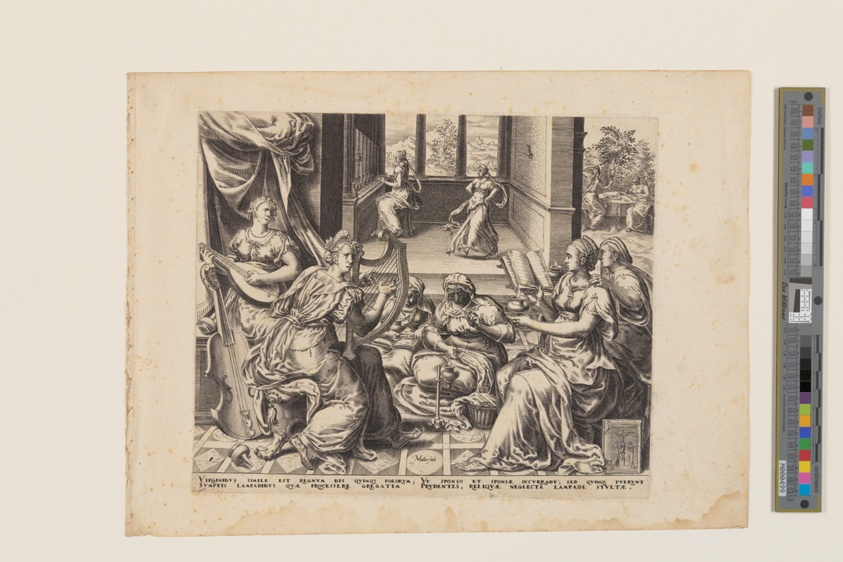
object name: Print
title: Parable of the Wise and Foolish Virgins: The Wise Virgins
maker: Herman Jansz Muller (Netherlandish, c. 1540–1617); after Gerard van Groeningen (Flemish, active c. 1500-1599)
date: c. 1567-70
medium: Engraving on ivory laid papaer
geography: Netherlands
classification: print; paper; prints and drawing; engraving